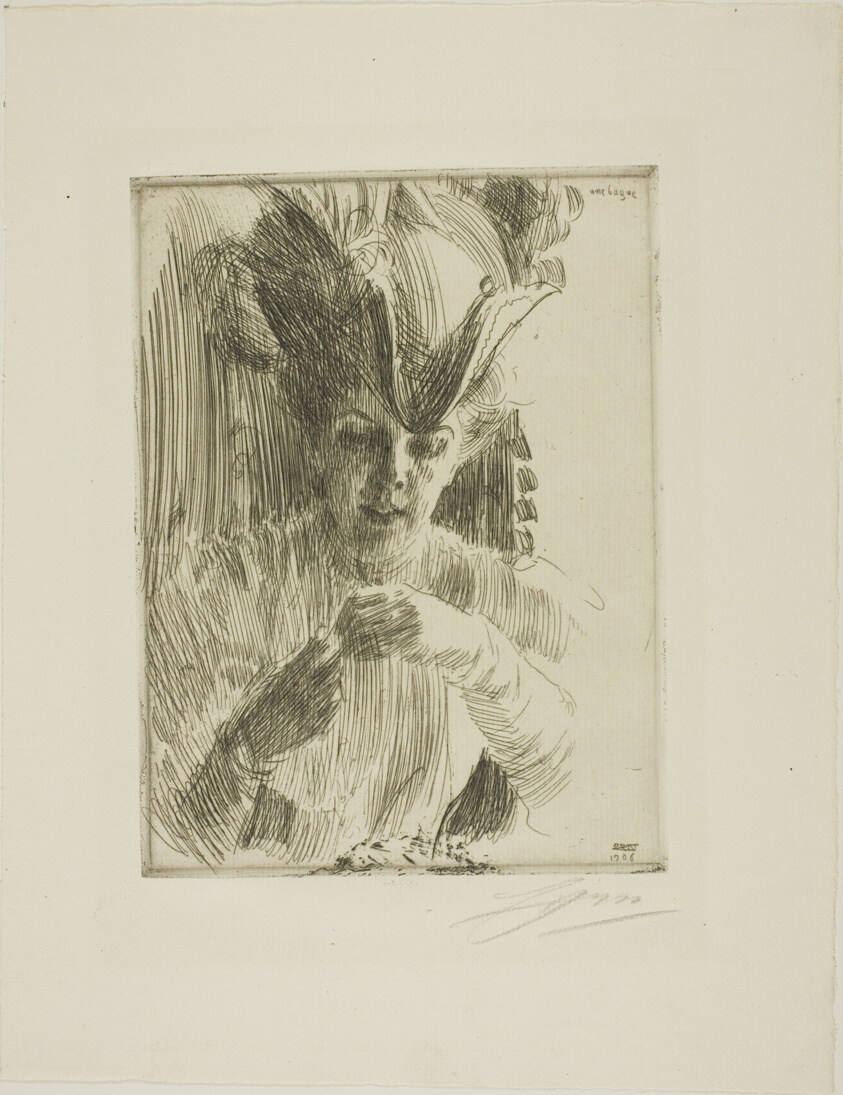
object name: Print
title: A Ring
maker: Anders Zorn (Swedish, 1860-1920)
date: 1906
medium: Etching on ivory laid paper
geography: Sweden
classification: etching; print; prints and drawing